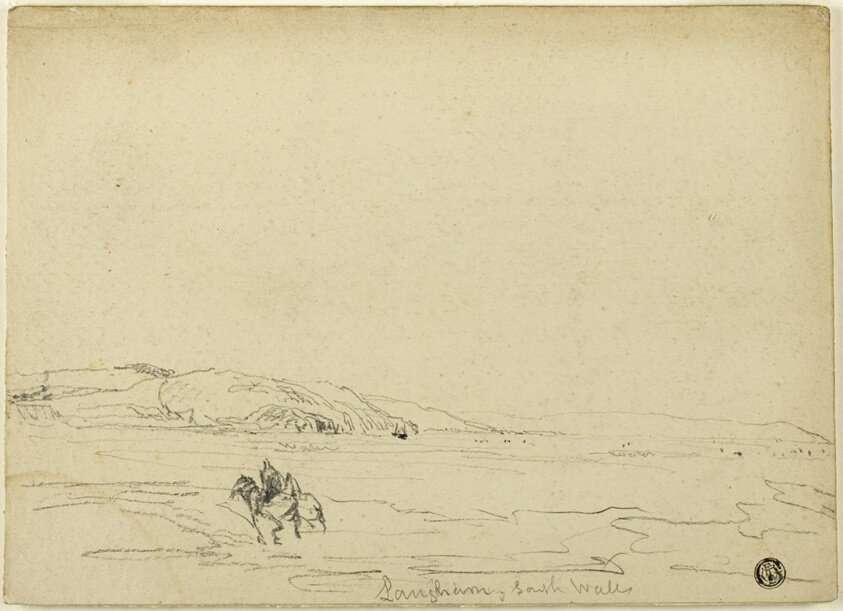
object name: Drawing and Watercolor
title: Langham, South Wales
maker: David Cox, the elder (English, 1783-1859)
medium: Graphite on cream wove paper, laid down on board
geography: England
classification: pen and ink drawings; drawings (visual works); prints and drawing